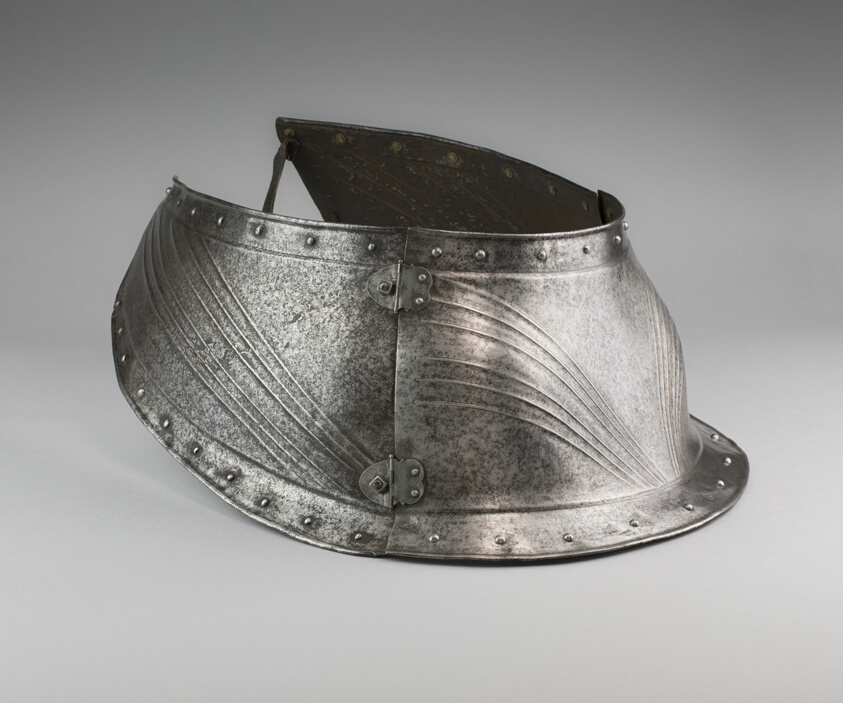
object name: Armor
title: Peytral of a Horse Armor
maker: German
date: c. 1520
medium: Steel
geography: Germany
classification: horse equipment; armor; arms and armor